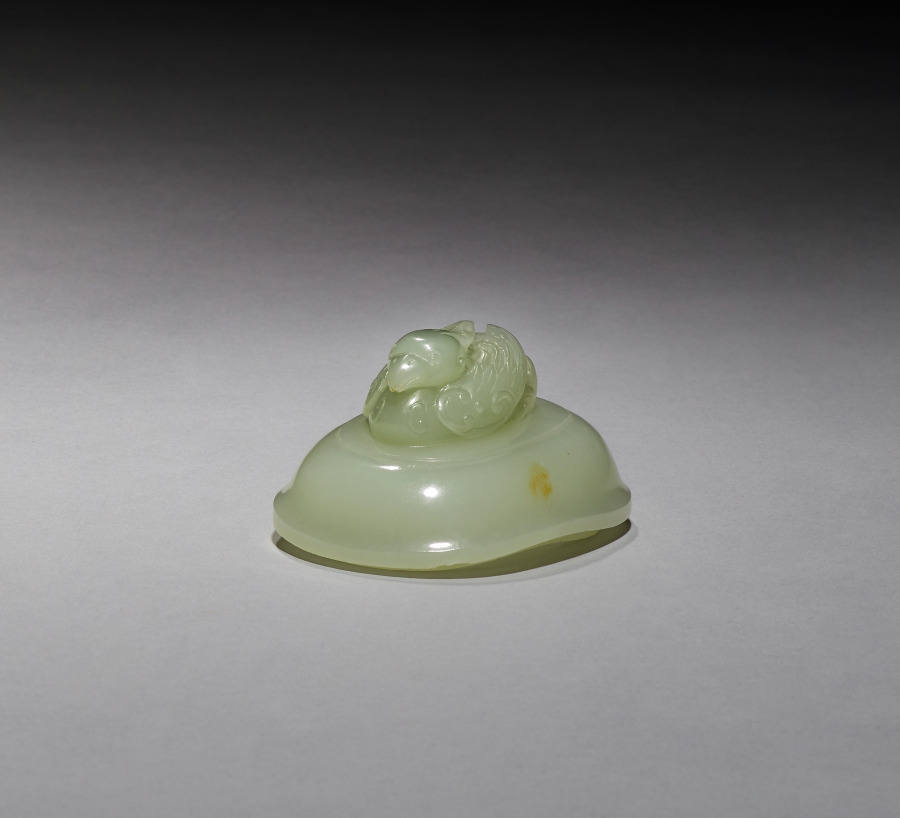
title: Pitcher (Gong) with Dragon and Bird-Headed Handle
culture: China, Qing dynasty (1644–1911)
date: 1700s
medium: pale greenish-white jade with brown markings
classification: Jade